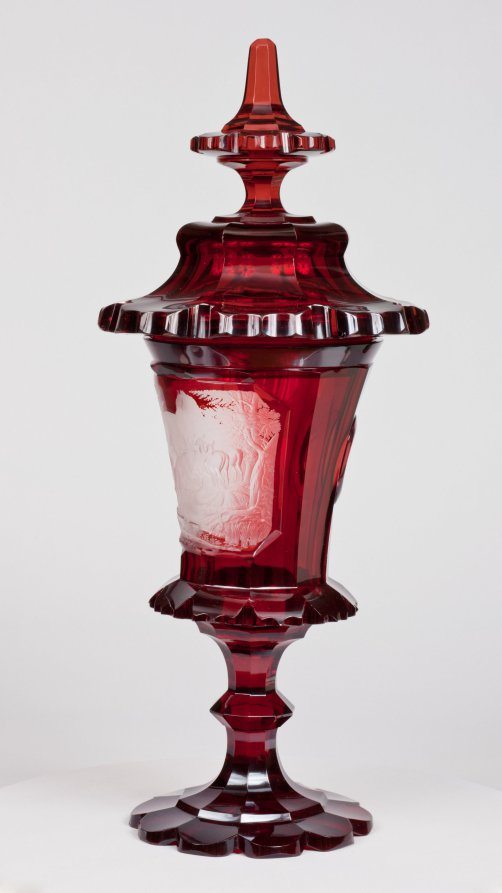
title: Covered Cup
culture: Bohemia, 19th century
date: mid-1800s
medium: ruby glass with engraved decoration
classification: Glass